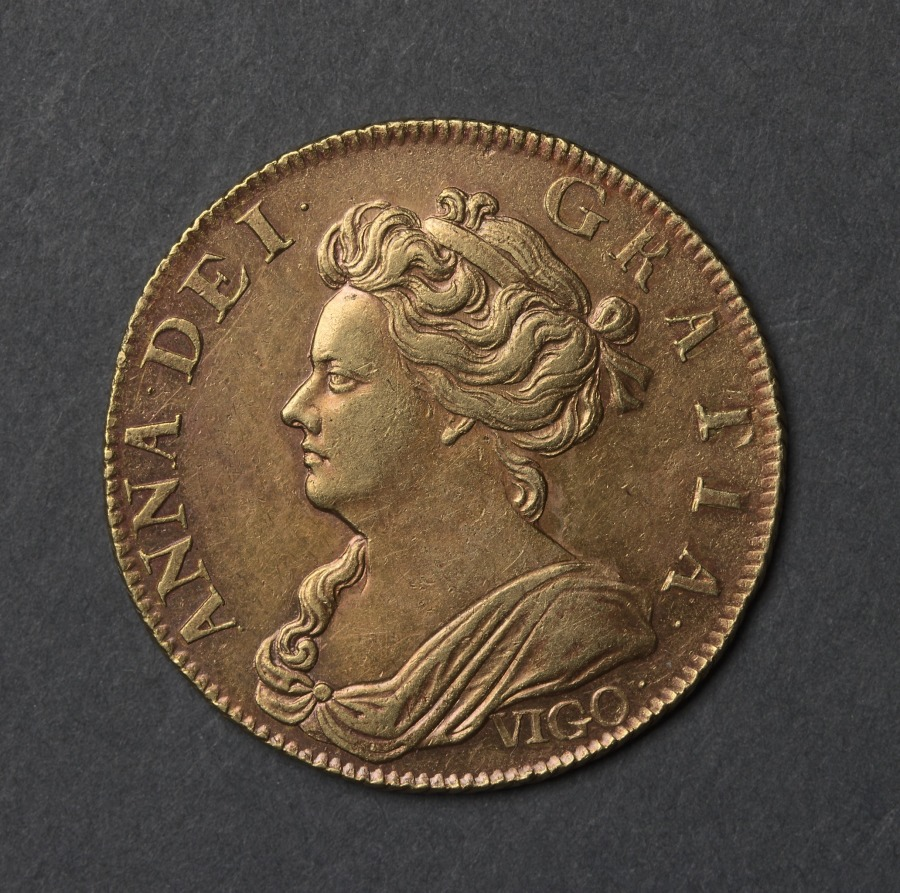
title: Guinea: Anne (obverse); Shields and rose (reverse)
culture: England, Anne, 1702-1714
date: 1703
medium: gold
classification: Coins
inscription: ANNA.DEI. GRATIA VIGO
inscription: MAG BR. FRA ET. HIB REG 1703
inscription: DECUS ET TUTAMEN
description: The coinage of Anne's reign remained fairly constant being inaugurated in 1662. Before the Act of Union with Scotland (1706), the arms of England and Scotland remined separate, as shown. After the act the two arms were conjoined on one shield. The word Vigo denotes that the coins were struck from gold captured from the Spanish at the Battle of Vigo Bay (1702). Although silver coins bearing the Vigo inscription are less rare, the three gold denominations bearing the symbol are all extremely rare.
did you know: The Battle of Vigo Bay occurred on October 23, 1702. After the battle the treasure, largely of silver with a tiny proportion of gold, was transported back to England and coins were made bearing the inscription Vigo.